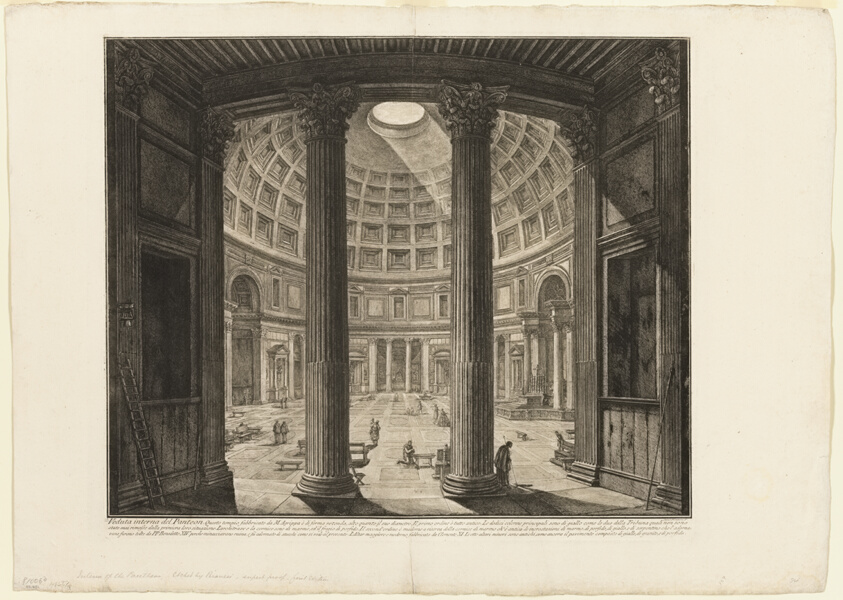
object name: Print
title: Interior view of the Pantheon, from Views of Rome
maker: Giovanni Battista Piranesi (Italian, 1720-1778); published by Francesco (Italian, 1758-1810) and Pietro Piranesi (Italian, born 1758/9)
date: 1768, published 1800–07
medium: Etching on heavy ivory laid paper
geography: Italy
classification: etching; print; prints and drawing